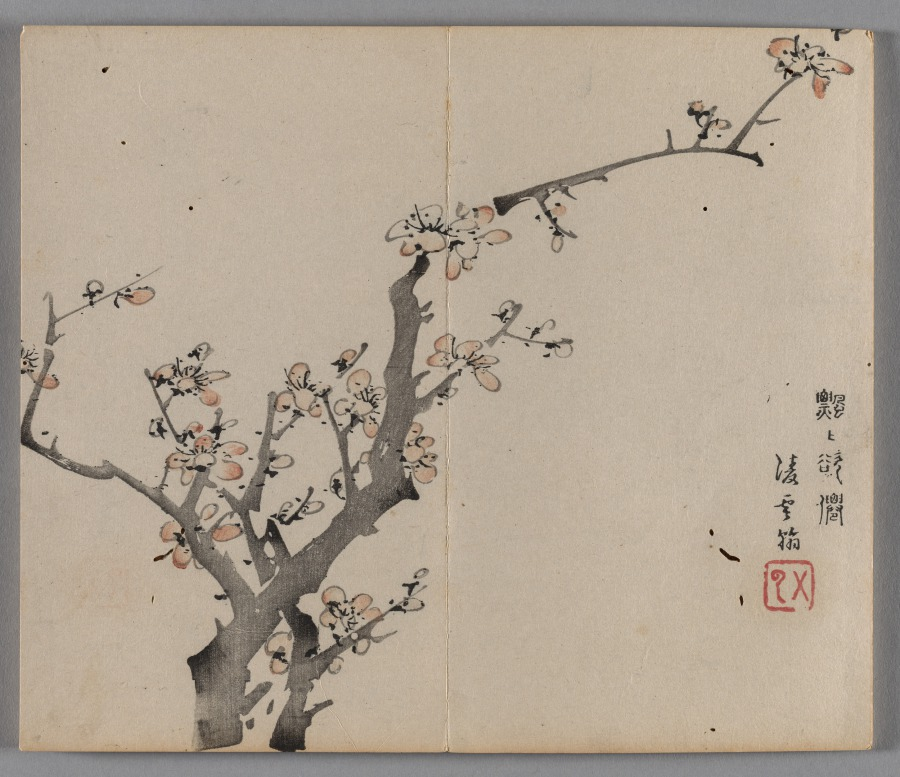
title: Ten Bamboo Studio Painting and Calligraphy Handbook (Shizhuzhai shuhua pu): Plum Blossoms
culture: China, Qing dynasty (1644-1911)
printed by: Hu Zhengyan (Chinese, c. 1584–1674)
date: 1633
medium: Woodblock-printed book; ink and colors on paper; first edition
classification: Print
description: Color printing reached a level of perfection in the early 1600s, as seen in this Ten Bamboo Studio Collection of Calligraphy and Painting and the Mustard Seed Garden Manual of Painting (printed 1679 and 1701). The painterly quality, precision in registering (aligning) the woodblocks, and harmonious colors made them the most successful color print editions in Chinese history. Both editions were printed and compiled in Nanjing, spread nationwide, and had a great impact on the arts in Japan and Korea.